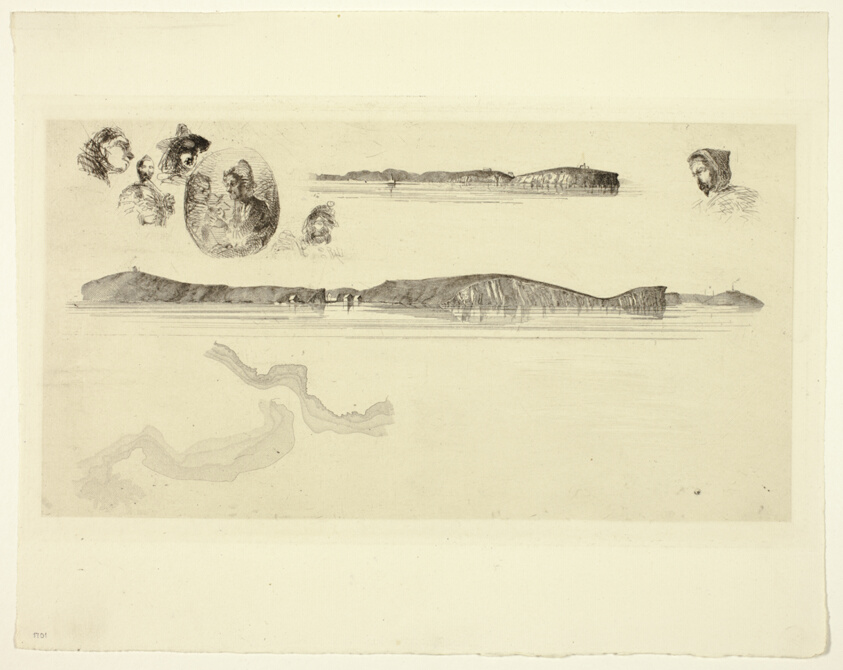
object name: Print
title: Sketches on the Coast Survey Plate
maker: James McNeill Whistler (American, 1834-1903)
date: 1854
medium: Etching in black ink on cream laid paper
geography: United States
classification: etching; print; prints and drawing; paper